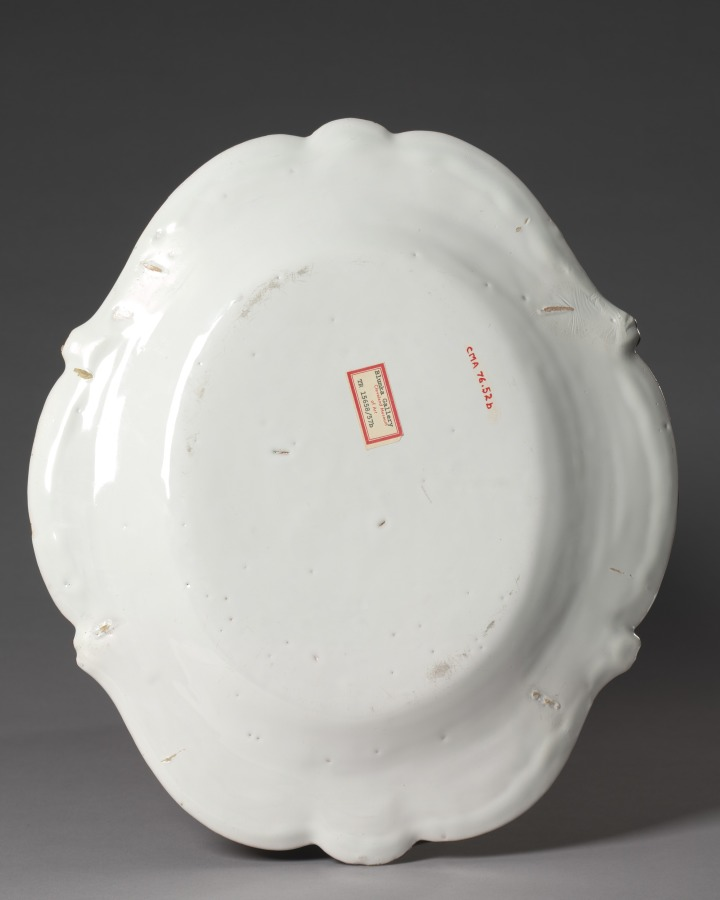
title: Stand for a Tureen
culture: France, Strasbourg, 18th century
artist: Paul Hannong Factory (French)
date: c. 1750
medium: tin-glazed earthenware (faience) with enamel decoration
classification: Ceramic